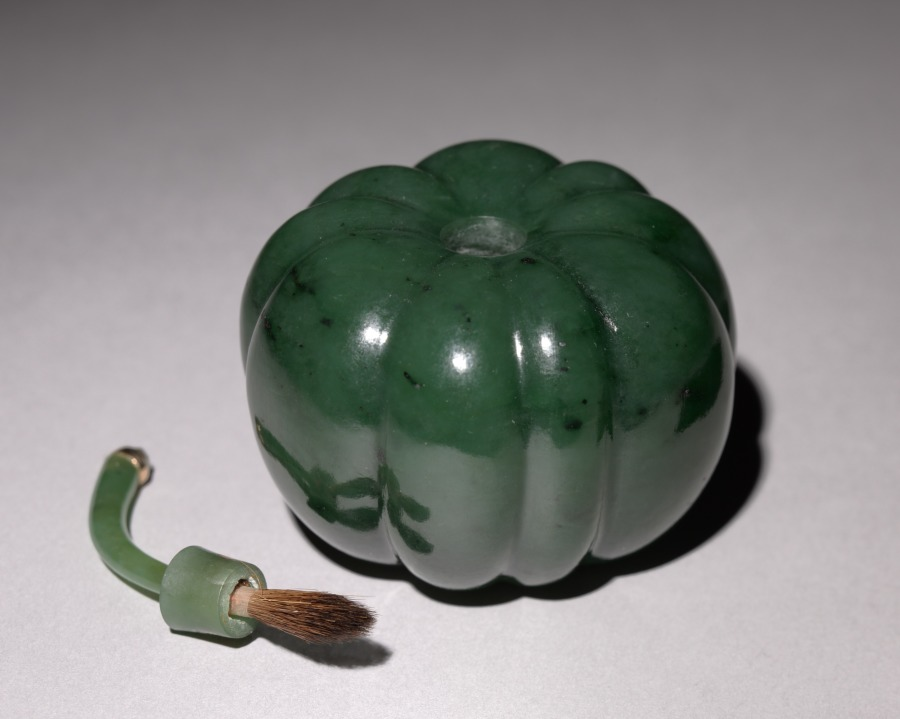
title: Stamp Moistener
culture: Russia, St. Petersburg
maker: firm of House of Fabergé (Russian, 1842–1918)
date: c. 1895–1915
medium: nephrite, diamonds, gold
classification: Miscellaneous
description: This stamp moistener in the form of a green tomato is carved out of a single piece of jade. The stem, tipped by a diamond mounted in gold, is removable. The interior end of this stem holds the brush that is used to wet a stamp for letters.